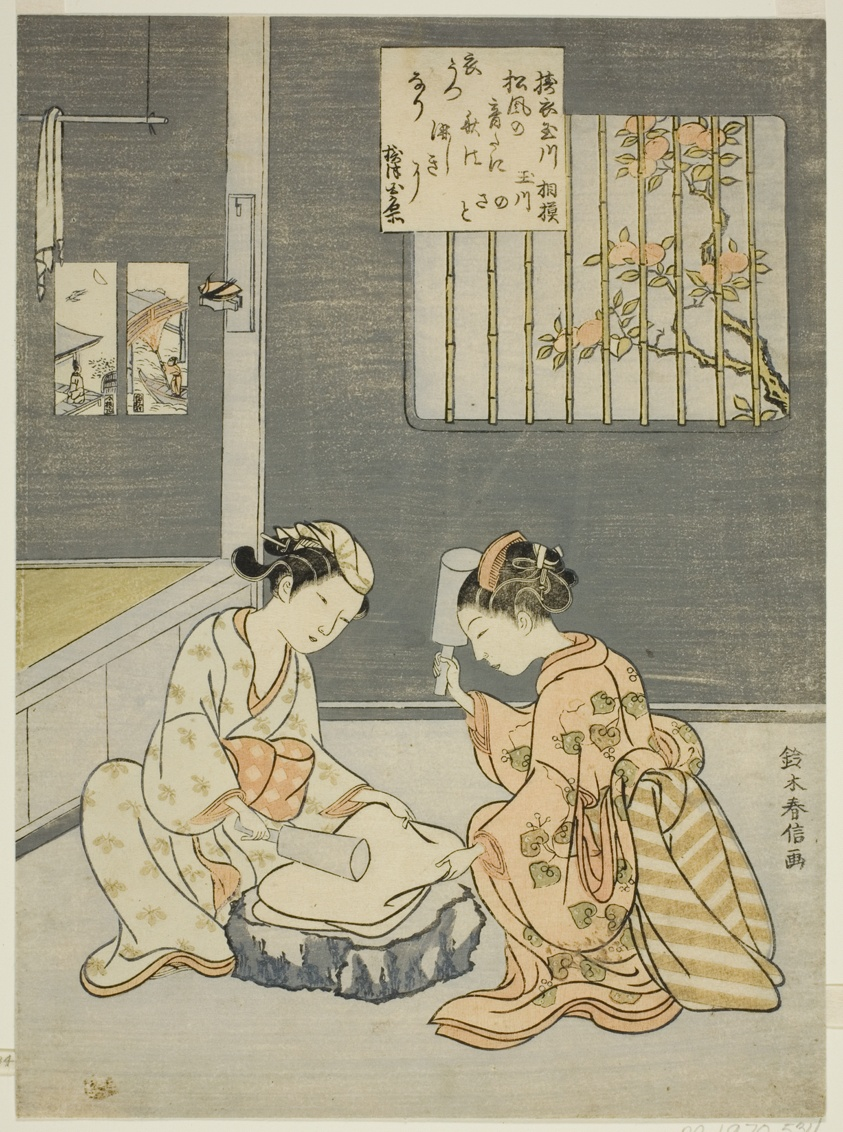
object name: Print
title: Cloth-fulling Jewel River, from an untitled series of Six Jewel Rivers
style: Japanese (culture or style)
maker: Suzuki Harunobu 鈴木 春信; Japanese, 1725 (?)-1770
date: c. 1767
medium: Color woodblock print; chuban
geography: Japan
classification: woodblock print; print; asian art